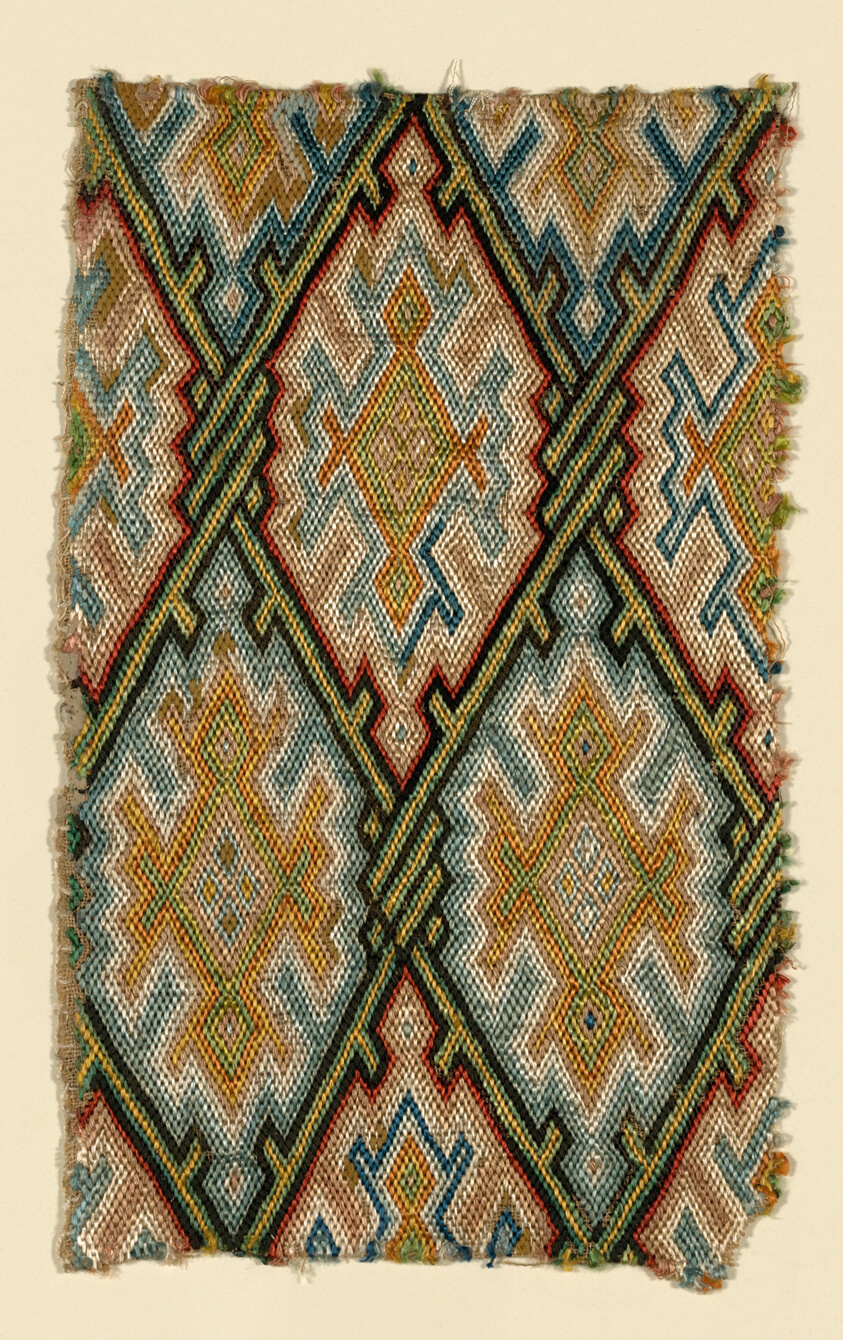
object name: Textile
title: Fragment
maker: Italy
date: 17th century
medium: Linen, plain weave; embroidered with wool and silk floss in flame stitch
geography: Italy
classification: textile; needlework (visual works)